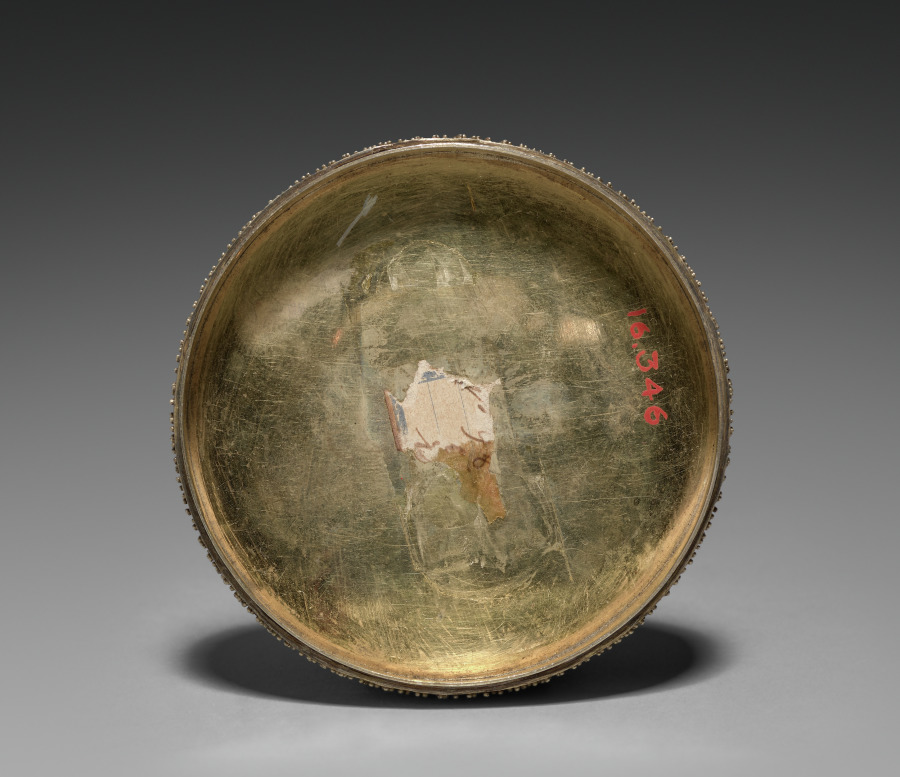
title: Box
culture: Germany ?, late 18th century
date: late 1700s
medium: enamel on copper with gilt metal mounts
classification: Miscellaneous